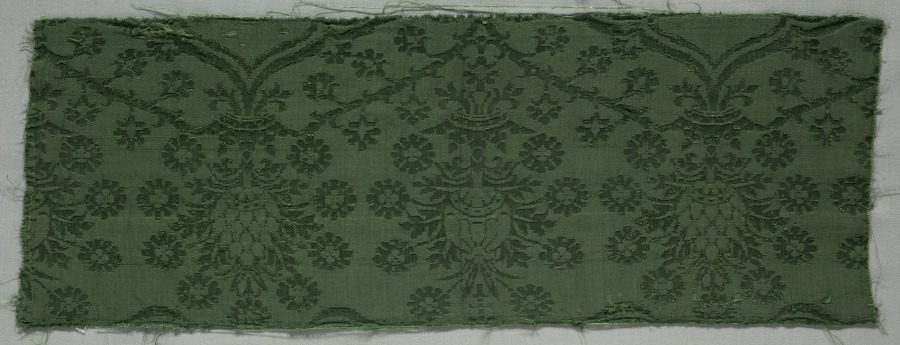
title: Silk Damask Textiles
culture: Italy, second half of the 15th century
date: 1450–1599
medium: damask, silk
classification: Textile